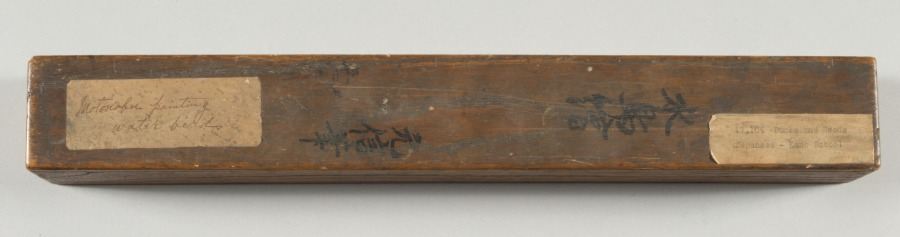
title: Ducks and Reeds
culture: Japan, Momoyama period (1573-1615) to Edo period (1615-1858)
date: early 1600s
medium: hanging scroll; ink on paper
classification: Painting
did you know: This painting was produced by a member of the Kano school.